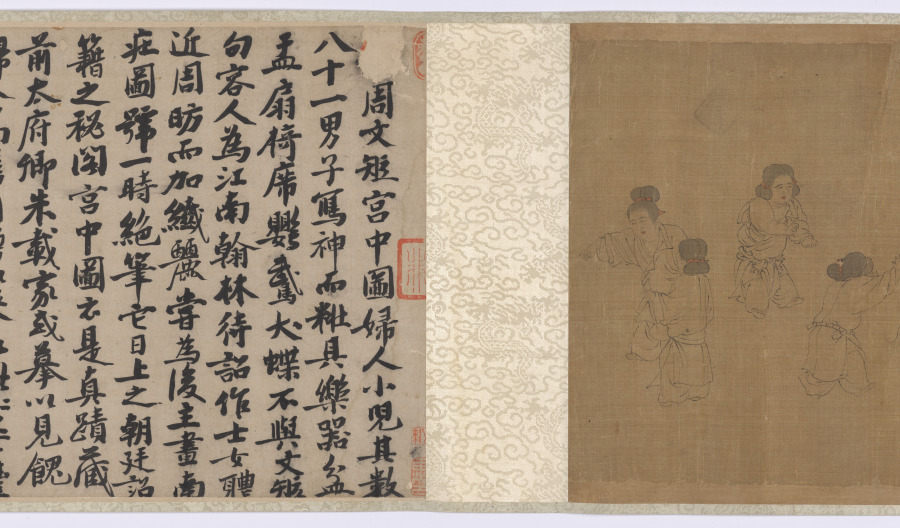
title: In the Palace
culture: China, Southern Song dynasty (1127-1279)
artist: after a work attributed to Zhou Wenju (Chinese, active 942–961)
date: before 1140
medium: Handscroll; ink and light color on silk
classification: Painting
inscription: 1 colophon and 13 seals: 1 colophon and 1 seal of Zheng Cheng 張澂 (d. 1143); 12 seals unidentified.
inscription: Colophon by Zhang Cheng 張澂 (d. 1143): 周文矩宮中圖婦人小兒其數八十，一男子寫神，而粧具、樂器、盆盂、扇椅席、鸚鵡、犬蝶不與。文矩句容人，為江南翰林待詔。作士女體近周昉，而加纖麗。嘗為後主畫南莊圖，號一時絕筆。它日上之朝廷，詔籍之祕閣。宮中圖云是真蹟，藏前太府卿朱載家。或摹以見餽。婦人高髻自唐以來如此。此卷豐肌長襦裙，周昉法也。予至嶠南，於端溪陳高祖之裔，見其世藏諸帝像，左右宮人梳髻與此畧同。而丫鬟乃作兩大鬟，垂 肩項間，雖醜而有真態。李氏自謂南唐，故衣冠多用唐制，然風流寔承六朝之餘。畫家者言辨古畫當先問衣冠車服，蓋謂是也。紹興庚申五月乙酉澹嵒居士題。 印：張澂印章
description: In the Palace depicts 13 ladies of the imperial household, three servants, and six children in fluent baimiao (plain drawing) brushwork, accentuated by color. The women entertain themselves by making music, tending children, and playing with pets. Their elaborate hairstyles, plump figures, and flowing robes are reminiscent of Tang dynasty fashion. The scroll illustrates elegant court life and is a direct copy of the original by Zhou Wenju (active 940–75) from Zhenjiang, Jiangsu province. Zhou was employed at the Southern Tang court in Nanjing under Emperor Li Yu (reigned 961–76), a prolific poet.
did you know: The ladies' elaborate hairstyles, plump figures, and flowing robes are reminiscent of Tang dynasty fashion.